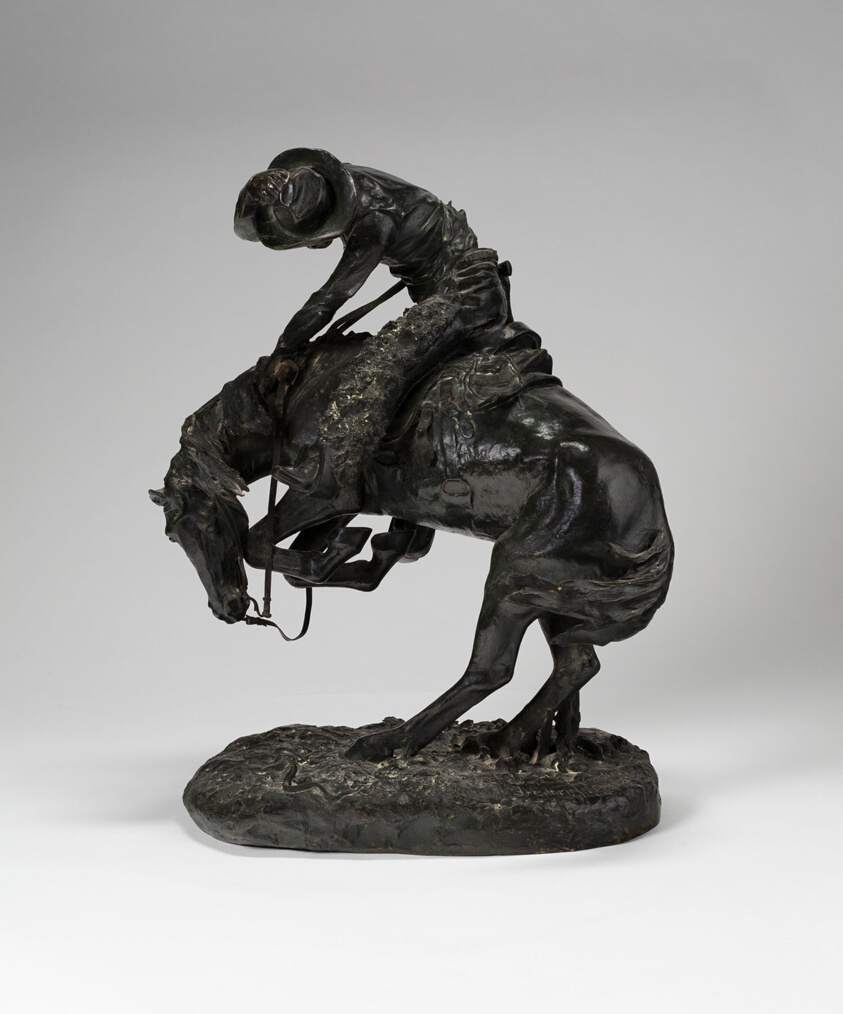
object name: Sculpture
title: The Rattlesnake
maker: Frederic Remington (American, 1861–1909)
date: Modeled 1905, cast 1918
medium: Bronze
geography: United States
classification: sculpture; bronze